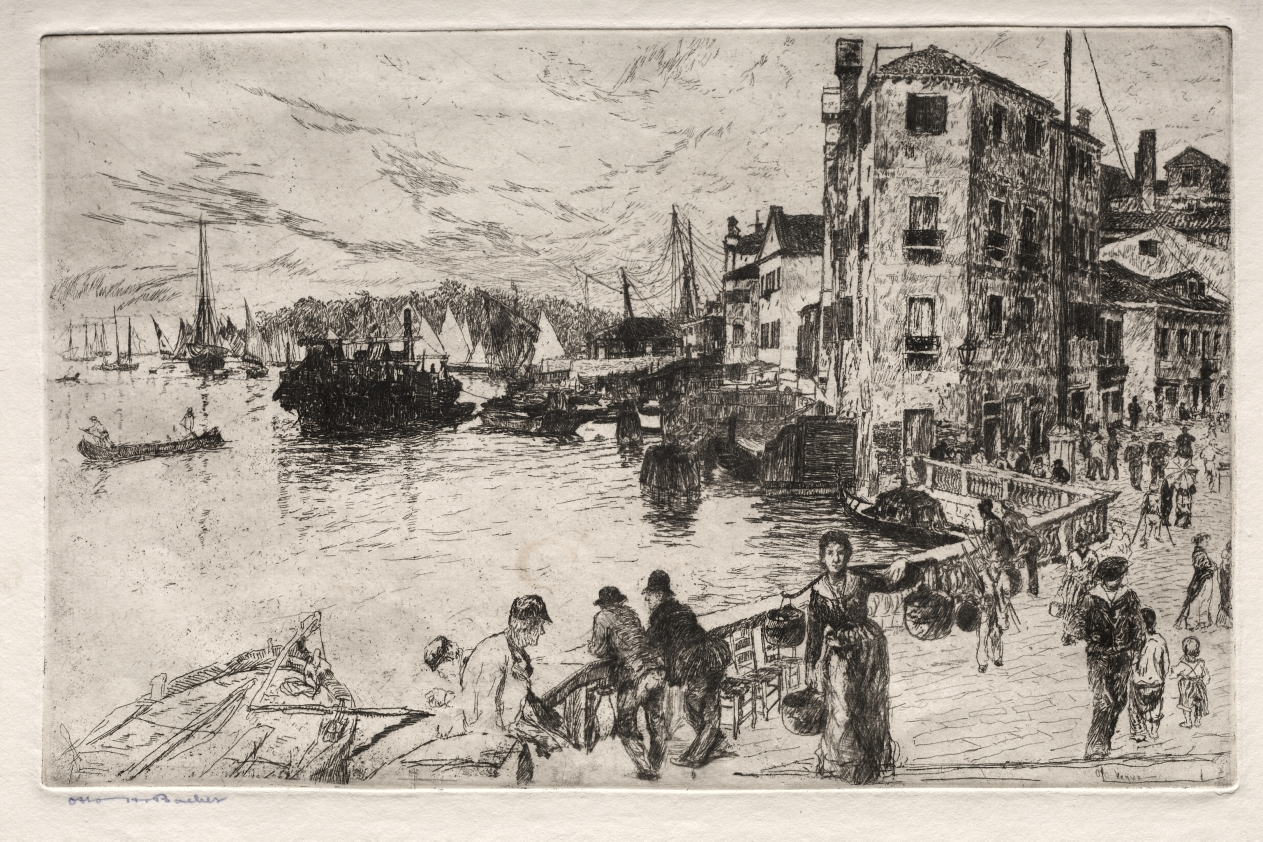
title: Etchings of Venice: Castello Quarters, Riva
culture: America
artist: Otto H. Bacher (American, 1856–1909)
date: 19th century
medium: etching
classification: Print